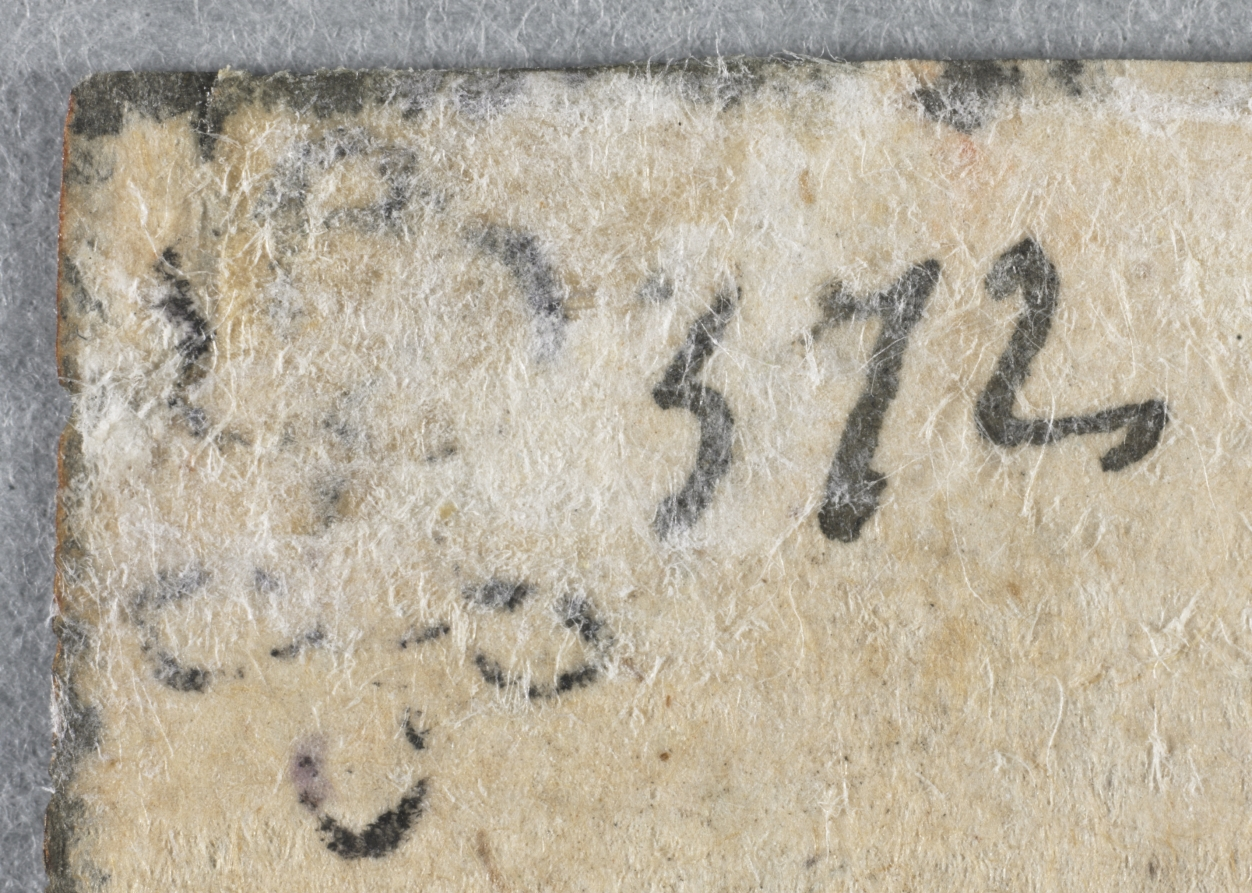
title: Allegory of Christian Belief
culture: Germany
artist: Johann Liss (German, c. 1597–1631)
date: c. 1622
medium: pen and brown ink and brush and brown wash; framing lines in pen and black ink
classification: Drawing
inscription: signed, lower right, in brown ink: Johan Liss / Mahler [illegible] / Holsati[a][masked] ; by artist, upper right, in brown ink: Alle Kunst undt widtz ist / eitel staub. / Hoch weisheidt ist ann. / Christum gelaub. ; by artist, lower right, in brown ink: Zu Rom den 19 martis Ao ["o" in superscript] 16[illegible, final two numbers abraded] ; upper left, in brown ink: + [collector's mark?]; upper right, along right edge, in brown ink: 265 [sideways] ; VERSO, upper left, in ink: 572 ; upper right, in graphite: 69 [sideways] ; center, in graphite: No. 99 al ; lower right, in graphite: Joh. Liss. [erased] ; lower left, in graphite: mj [?] ; lower left, in graphite: T5910 ; lower left, in graphite: Jah. Lys 1570-1626 ; lower right, in graphite(?): Bo. 20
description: This exceedingly rare drawing is one of only two signed sheets by Liss, who, in spite of the brevity of his career, was one of the most important German-born painters of the 17th century. Here, faith is personified as a woman with bared breasts and bare feet, symbolic of true Christian belief: plain, pure, and without artifice. She has cast aside worldly things-a crown, scepter, and book-and gazes heavenward as smoke wafts from an urn. The long inscription indicates that the sheet is from an album amicorum, or friendship book, in which drawings, poems, and autographs were collected as souvenirs of acquaintanceships. Liss may have made the drawing to dazzle an influential recipient with his inventive interpretation of a traditional religious subject.